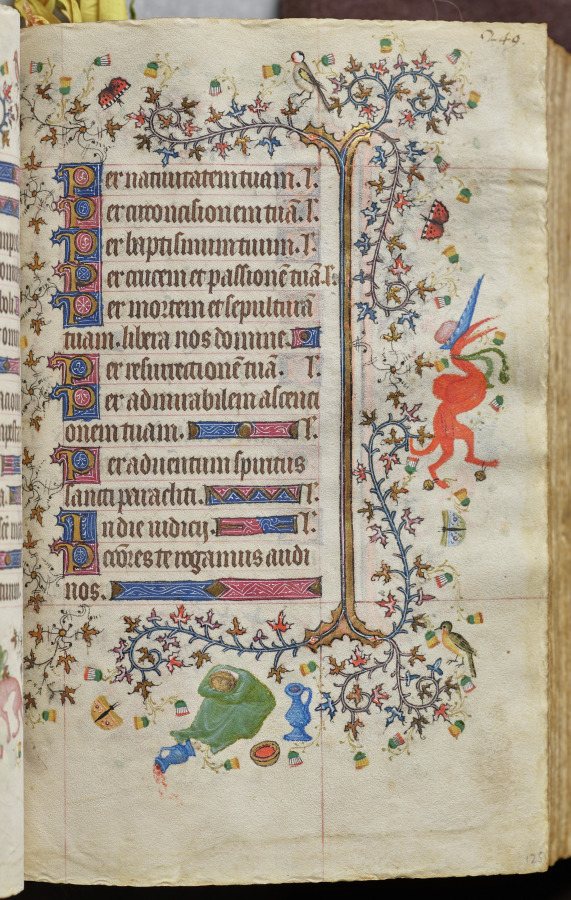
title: Hours of Charles the Noble, King of Navarre (1361-1425): fol. 125pr, Text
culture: France, Paris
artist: Master of the Brussels Initials and Associates (French)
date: c. 1405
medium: ink, tempera, and gold on vellum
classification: Bound Volume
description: This precious volume was obviously highly prized by its owner, the French-born King of Navarre, who had his coat of arms painted on no less than twenty folios. Rather than directly commissioning this manuscript from a specific workshop, it seems that Charles the Noble acquired his book of hours -- perhaps ready-made for the luxury market -- while on a trip to Paris in 1404-05. A collaborative effort, six painting styles are evidenced within the pages of this codex, those of two Italians, two Frenchmen, and two Netherlanders. The painter who was responsible for the planning and decoration of the book, and who produced seventeen of the large miniatures, was a Bolognese artist known as the Master of the Brussels Initials. His principal assistant, responsible for most of the borders, was a Florentine who signed his name "Zecho" da Firenze on folio 208 verso.